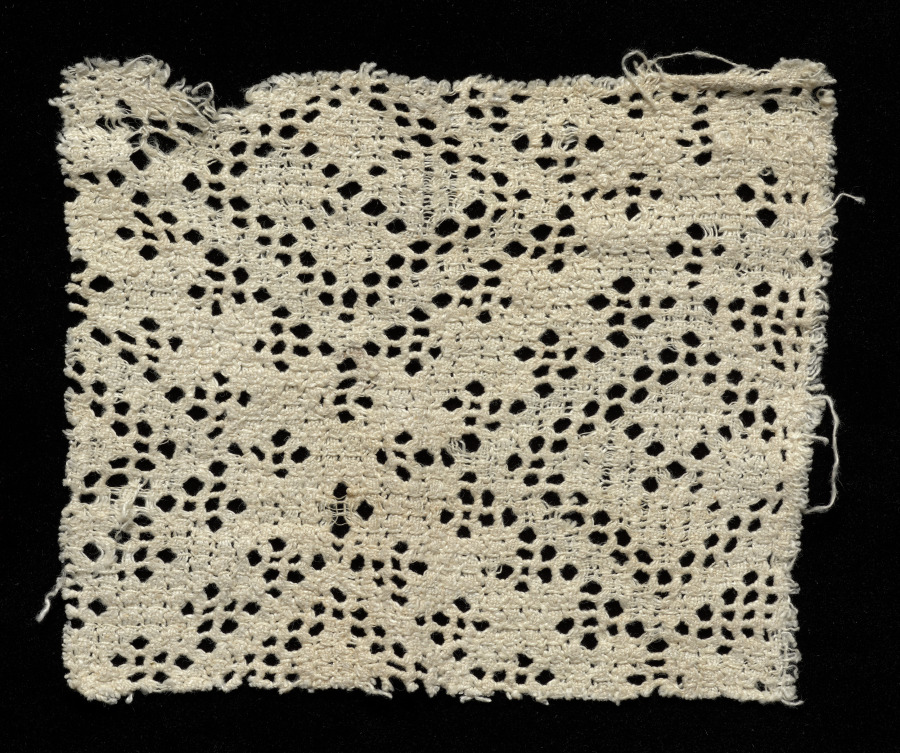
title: Lace fragment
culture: Spain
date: 1600s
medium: Linen: needle lace (drawnwork)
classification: Lace